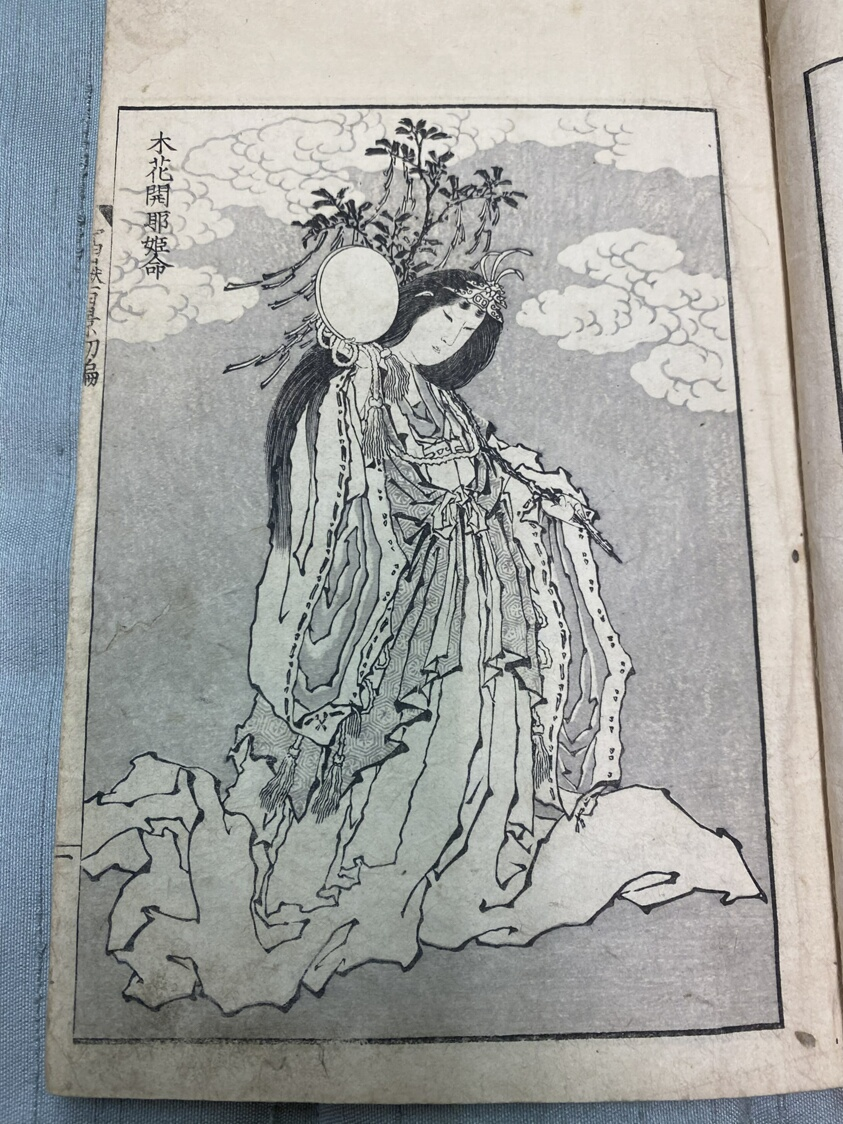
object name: Book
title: One-Hundred Views of Fuji (Fugaku hyakkei)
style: Japanese (culture or style)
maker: Katsushika Hokusai 魚屋北渓; Japanese, 1760–1849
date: c. 1834-35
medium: Woodblock printed book; 3 volumes complete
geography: Japan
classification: book; woodblock